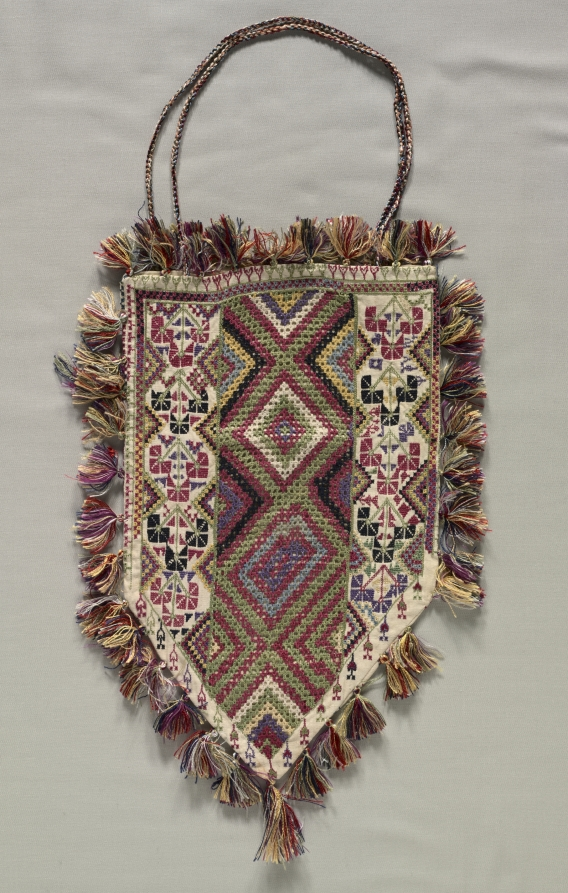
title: Bag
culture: Turkey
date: before 1957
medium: silk embroidery on cotton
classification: Embroidery